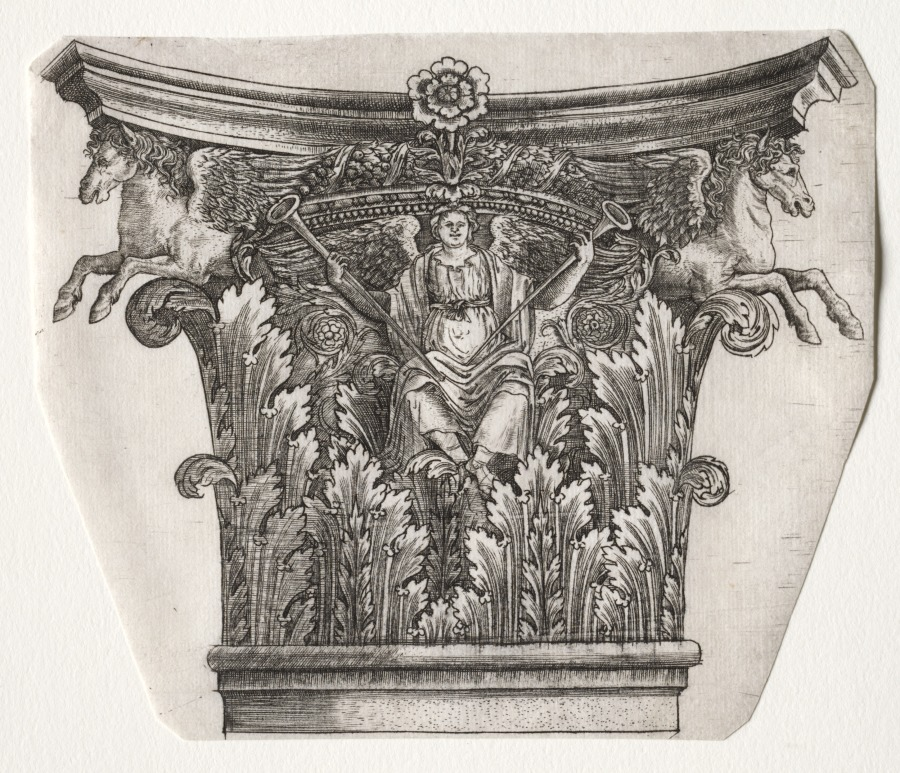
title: Base and Capital with Figure of Fame and Winged Horses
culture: Italy, 16th century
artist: Master G. A. with the man-trap (Italian, active 1525–50)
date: c. 1525–1550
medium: engraving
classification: Print